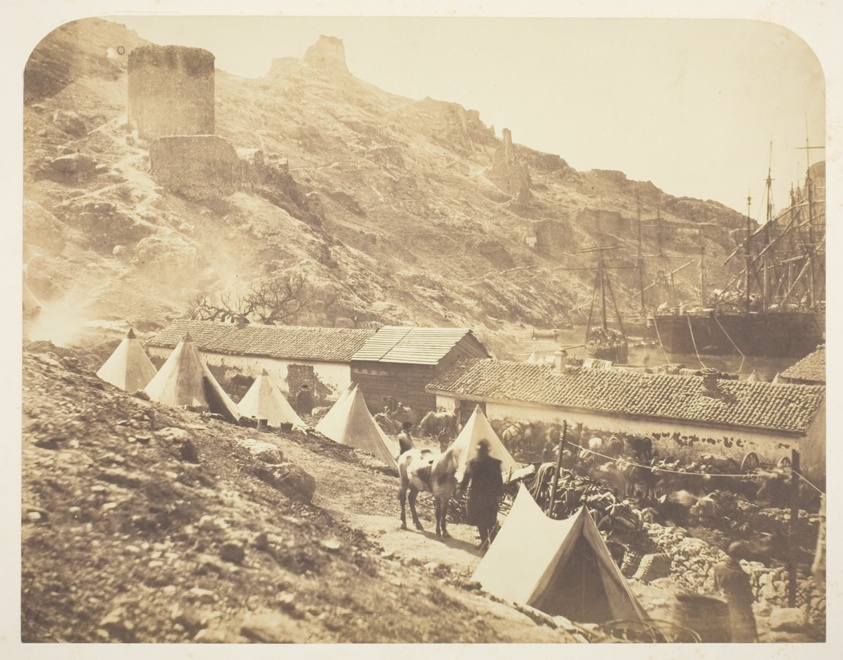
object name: Photograph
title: The Genoese Castle, Balaklava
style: 19th century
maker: Roger Fenton (English, 1819–1869)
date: 1855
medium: Salted paper print, from the album "Photographic Pictures of the Seat of War in the Crimea" (1856)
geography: England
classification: salted paper print; photographic process; photography; photograph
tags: Collected by Hugh Edwards